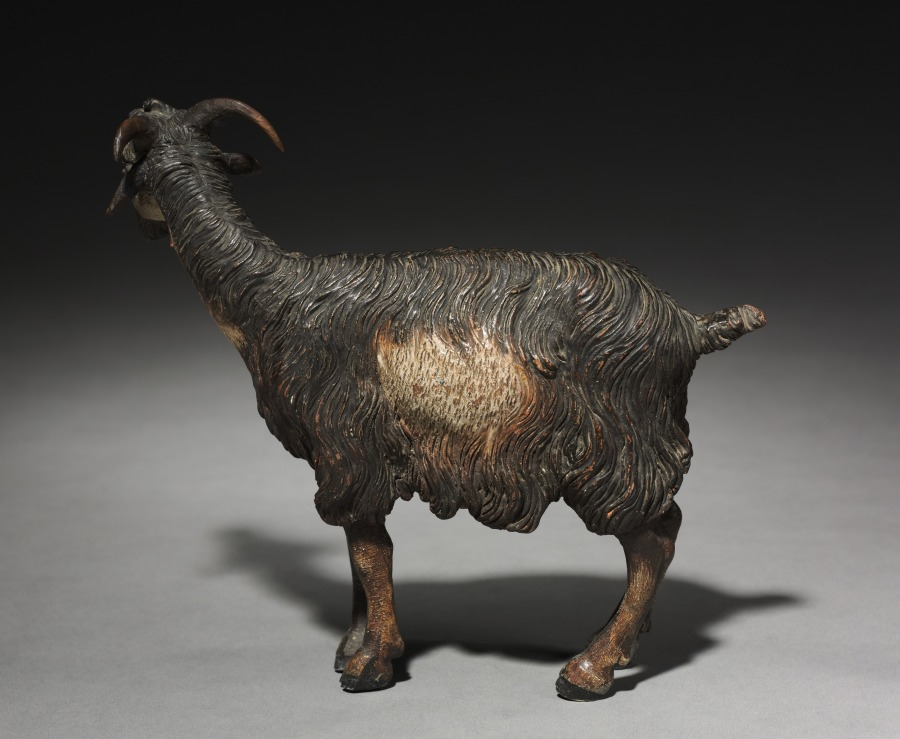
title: Figure from a Crèche: Standing Mountain Goat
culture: Italy, Naples, late 18th-early 19th century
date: 1780–1830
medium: painted wood and terracotta with various textiles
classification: Sculpture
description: The practice of creating scenes of the Nativity for the home dates from the early 1700s in Italy, where people began to set up doll-like figures of about a foot or less in height. The custom was particularly popular in Naples around 1800, where crèche scenes (crèche means cradle, or crib) included many figures, whose heads and hands of painted terracotta, stuffed cloth bodies, and clothing adapted from contemporary local costumes gave them an amazingly realistic character. Representations of the birth of Jesus can be traced to the first few centuries of Christianity. Both living creatures and sculptural depictions of them were used from early times. By the late middle ages it was customary to create life-size figures of wood or stone, naturalistically painted, to represent the characters who participated in the events of Jesus's early life. These sculptures were then arranged in scenes illustrating one or both of the most important of these events, the Adoration of the Shepherds and the Adoration of the Magi-the three kings from the East who came to pay homage to the Christ child. Used in churches, these large figures were especially popular in Italy, Central Europe, Spain, and Portugal. This Object in Focus presentation was organized by Henry Hawley, Curator of Renaissance and Later Decorative Arts and Sculpture.